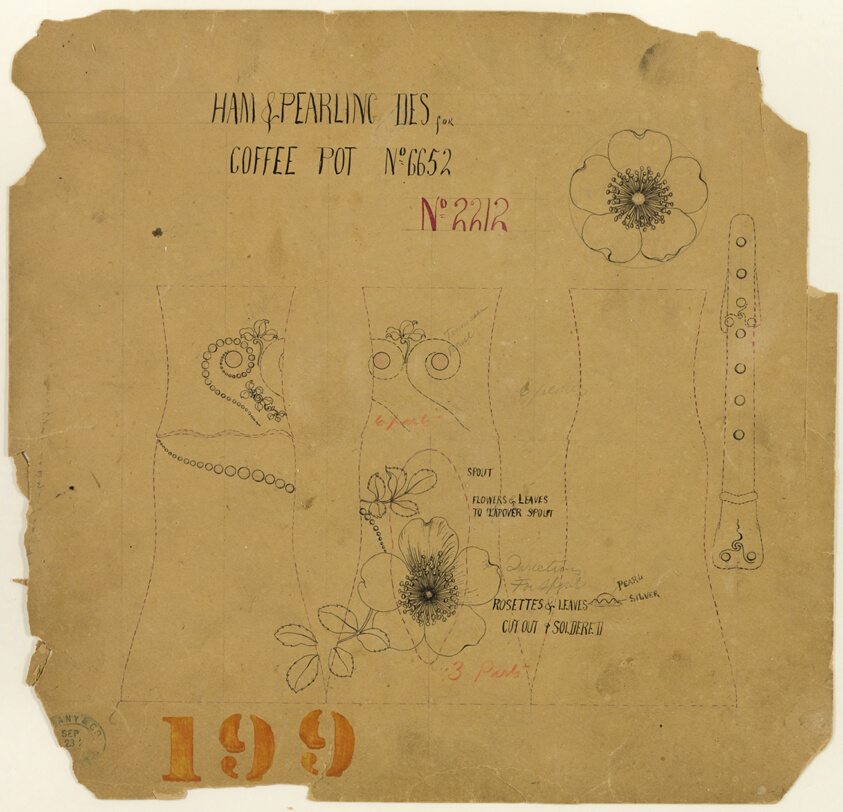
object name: Drawing and Watercolor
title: Ham and Pearling Design for Coffee Pot No. 6652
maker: Tiffany and Company (American, founded 1837)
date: c. 1882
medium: Red, orange & black ink, and orange crayon on tan wove paper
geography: United States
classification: prints and drawing; paper